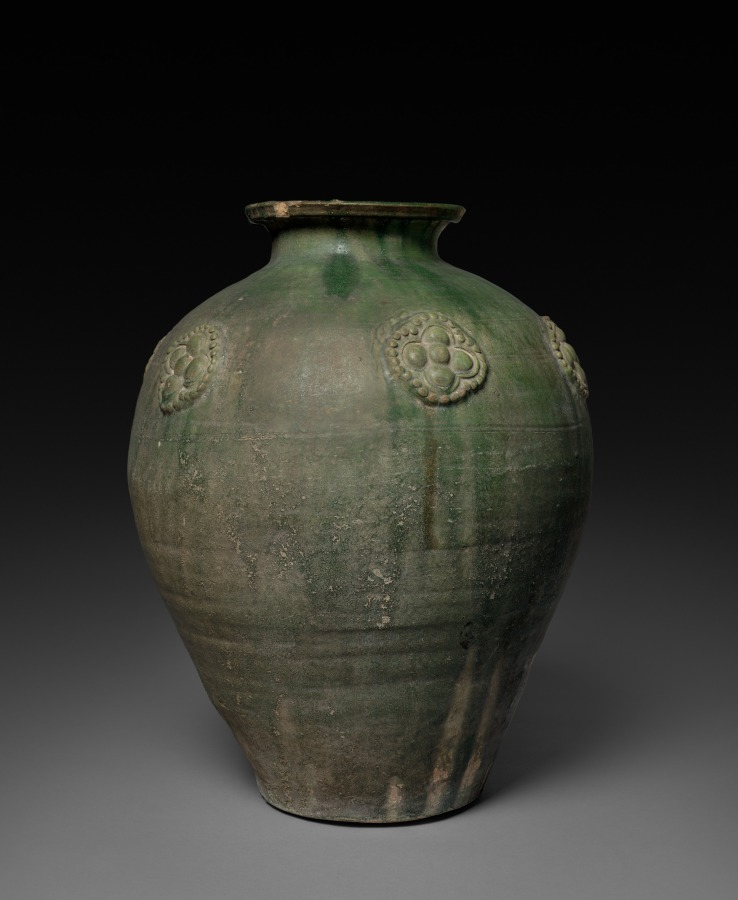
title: Jar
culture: China, Six Dynasties period (265-589) or Sui dynasty (581-618)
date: 500s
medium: glazed earthenware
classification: Ceramic